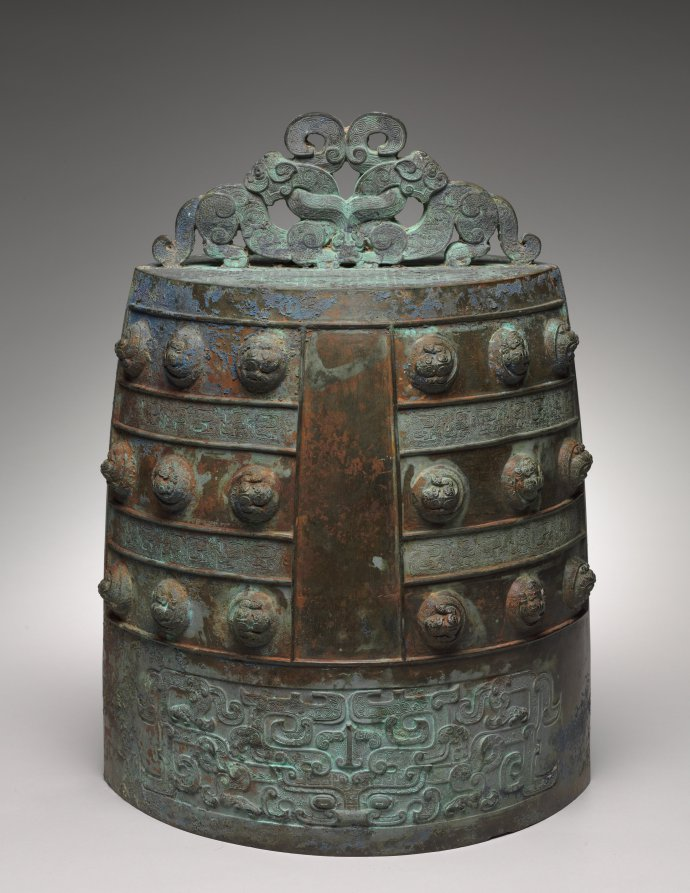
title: Bell (Bo Zhong)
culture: China, Eastern Zhou dynasty (770–256 BCE)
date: early 400s BCE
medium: bronze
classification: Metalwork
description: Music in the Eastern Zhou dynasty not only served ritual purposes but also provided entertainment in feudal courts. The elliptical cross-section of the Chinese bronze bell is unique; it could produce two notes depending on where the bell is struck, either at the rim or near the center. The bell is suspended when played and often belongs to a graduated set arranged according to pitch and size. This bell displays elaborate ornamentation and exquisite workmanship. A twin-bodied serpent intertwined with two tigers forms the suspension loop at the top. Coiled serpents form the knobs on the body. The lower part bears an animal mask, its horns interlaced with abstract bird designs.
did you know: The bell could produce two notes depending on where it is struck.